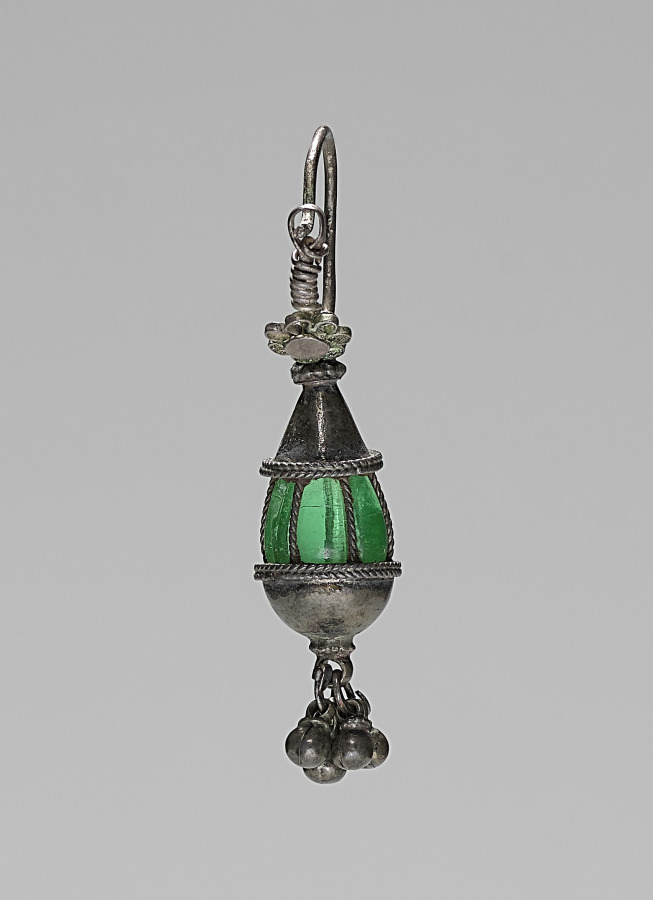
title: Earring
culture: India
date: 1800s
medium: silver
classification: Jewelry